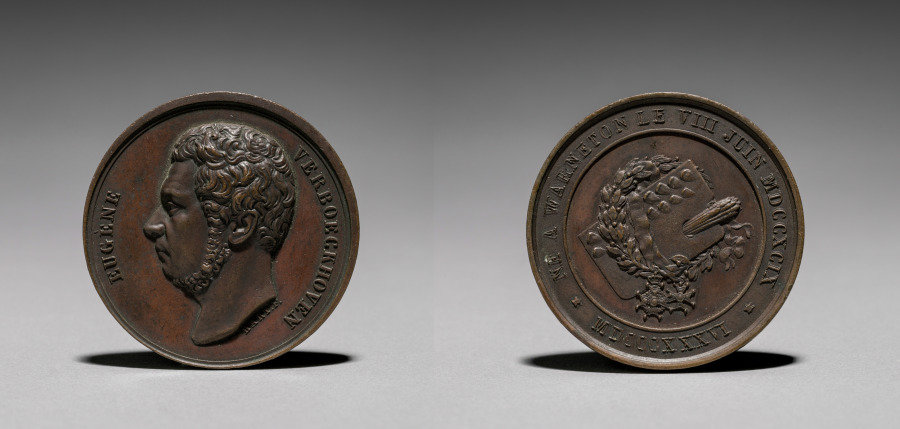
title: Medal: Eugene Verboeckhoven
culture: 19th century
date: 1800s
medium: bronze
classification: Metalwork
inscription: "EUGENE VERBOECKHOVEN"; signed: "Hart. F."